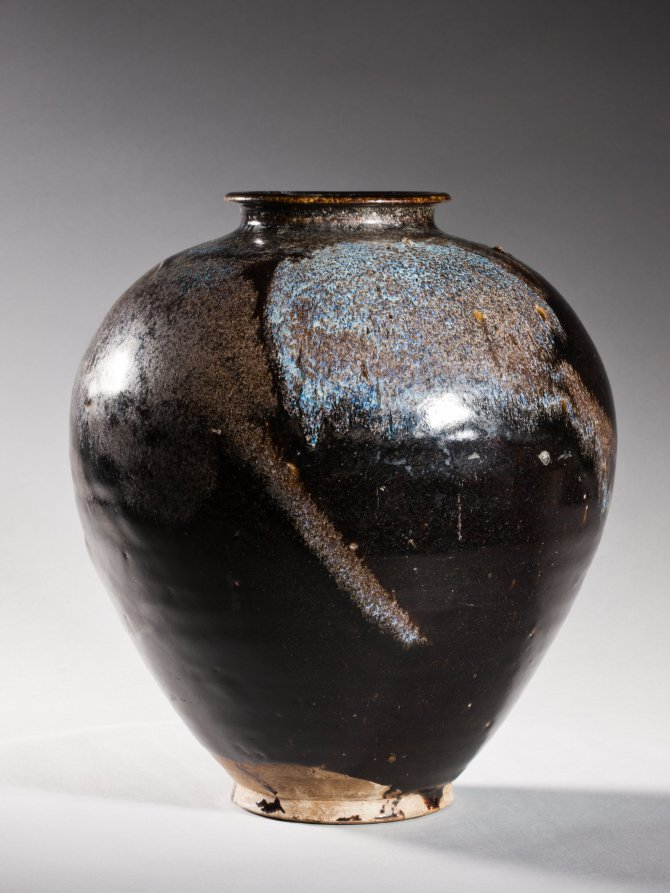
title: Jar: Black Ware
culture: China, Henan province, Huangdao kilns, Tang dynasty (618-907)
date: 700s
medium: glazed stoneware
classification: Ceramic